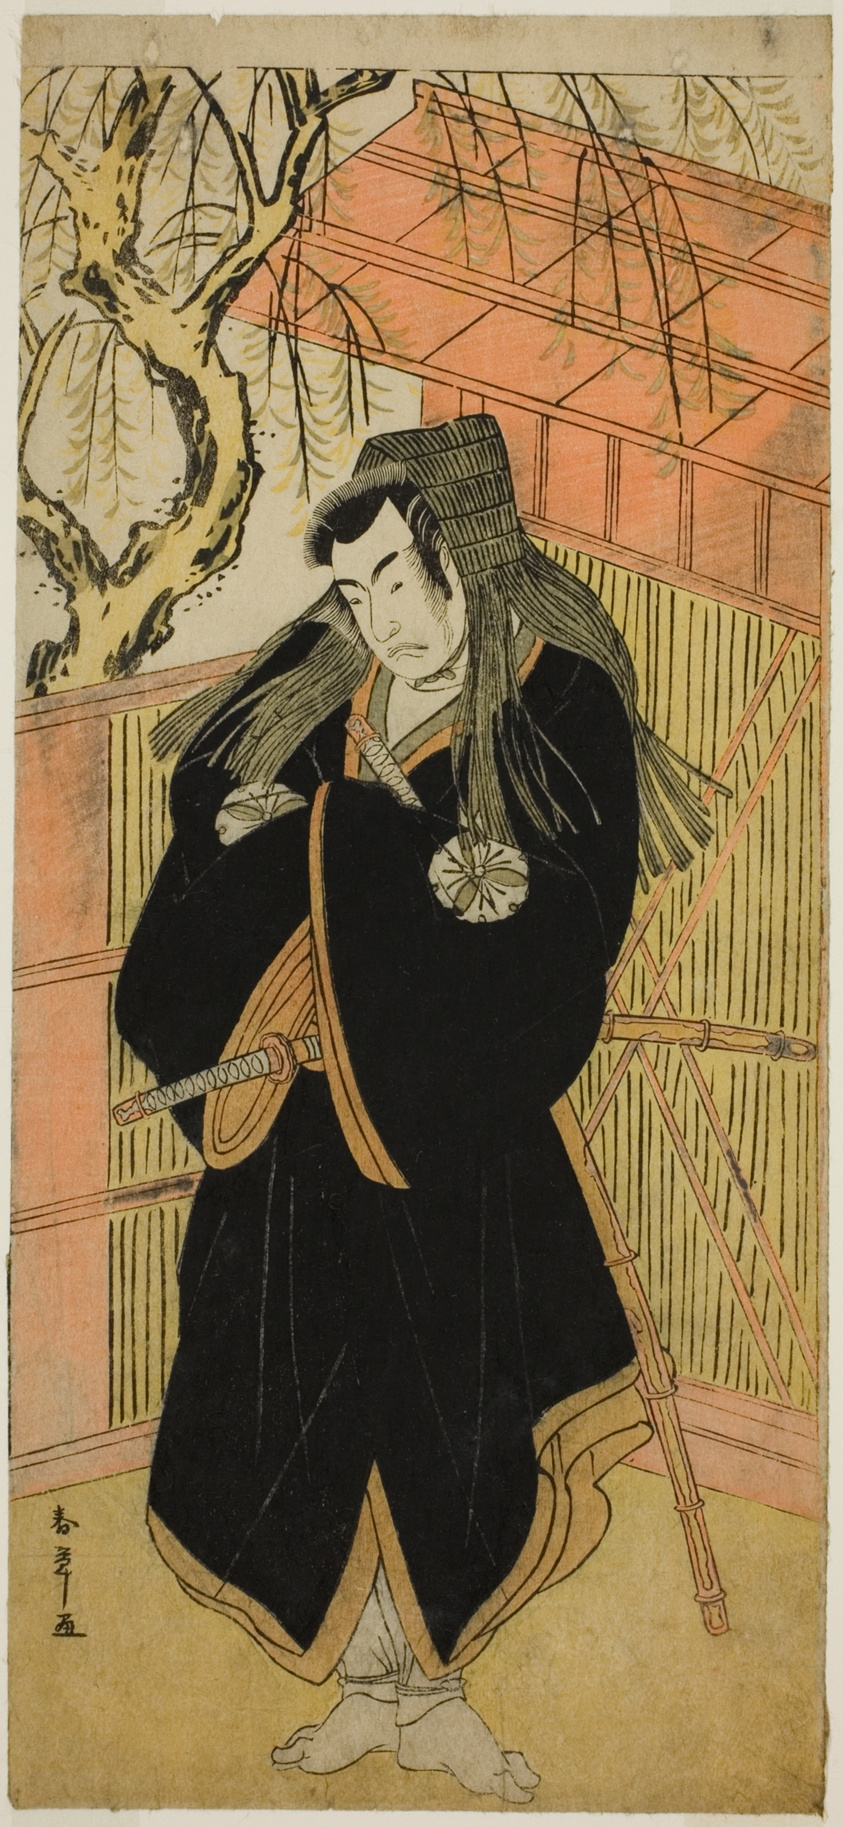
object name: Print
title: The Actor Matsumoto Koshiro IV as Matsuo-maru (?) in the Play Sugawara Denju Tenarai Kagami (?), Performed at the Nakamura Theater (?) in the Fourth Month, 1779 (?)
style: Japanese (culture or style)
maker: Katsukawa Shunsho 勝川 春章; Japanese, 1726-1792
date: c. 1779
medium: Color woodblock print; hosoban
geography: Japan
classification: woodblock print; print; asian art